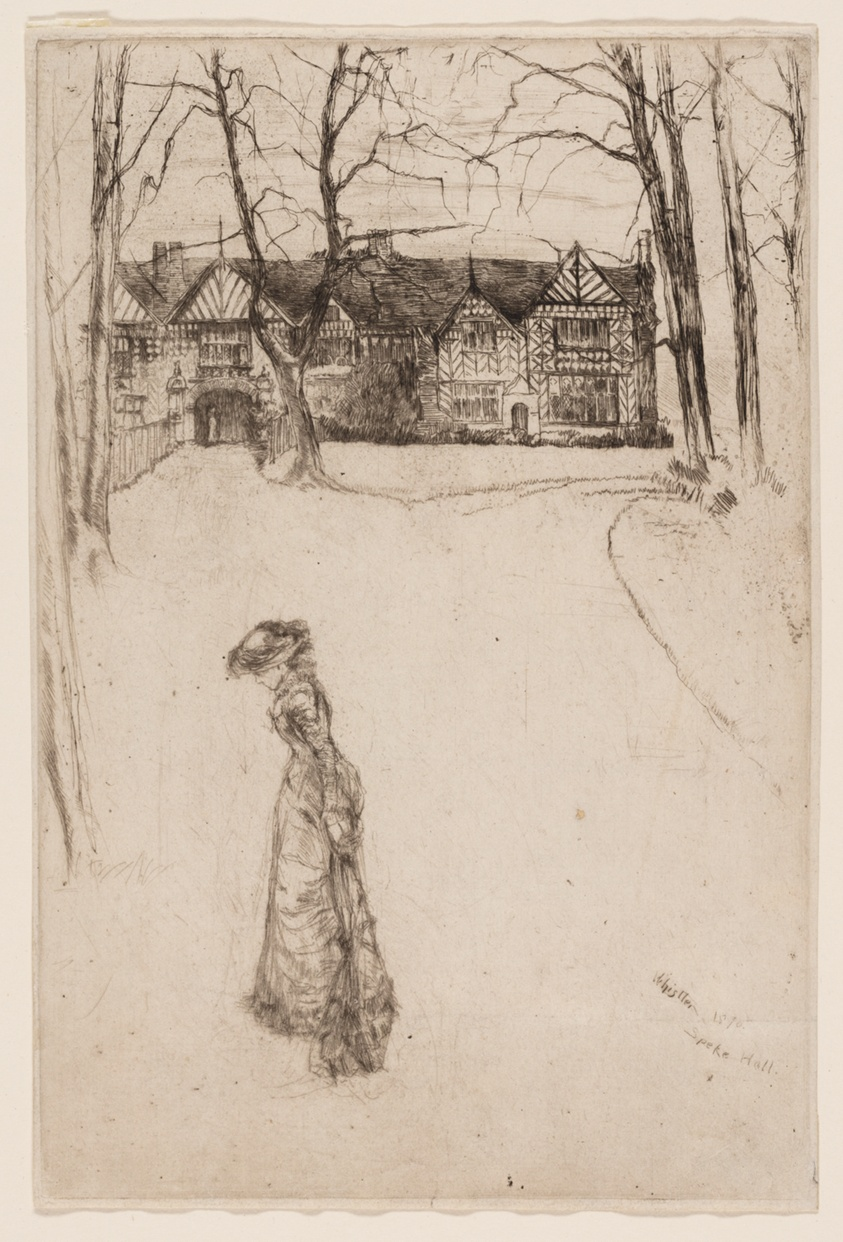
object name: Print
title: Speke Hall: The Avenue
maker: James McNeill Whistler (American, 1834-1903)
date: 1870–1878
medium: Etching and drypoint with foul biting in black ink on off-white laid paper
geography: United States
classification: etching; foul biting; drypoint; print; prints and drawing; paper